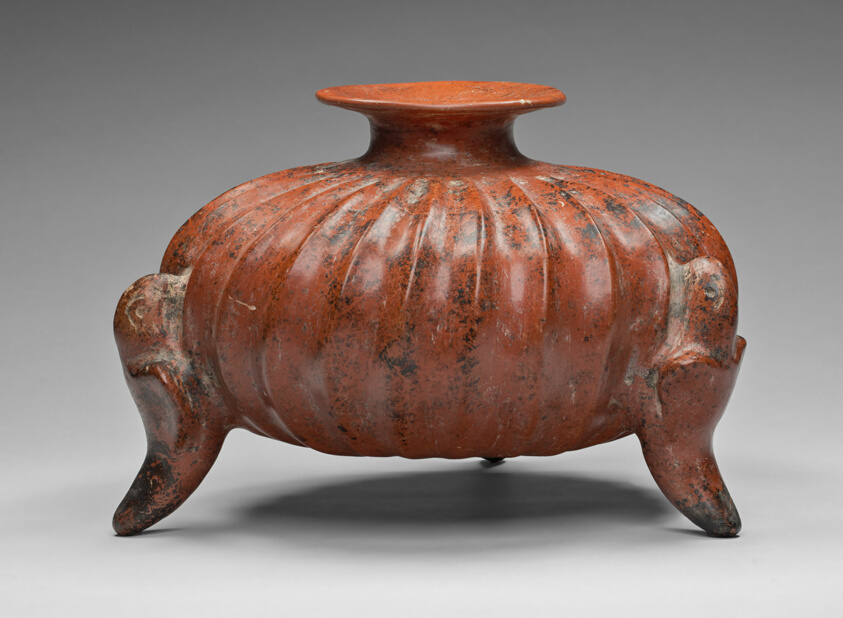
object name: Vessel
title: Vessel in the Form of a Squash with Parrot Supports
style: colima, mesoamerican, Arts of the Americas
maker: Colima (Colima, Mexico)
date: 1–200 CE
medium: Ceramic and pigment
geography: Colima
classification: vessel; art of the americas; ceramics